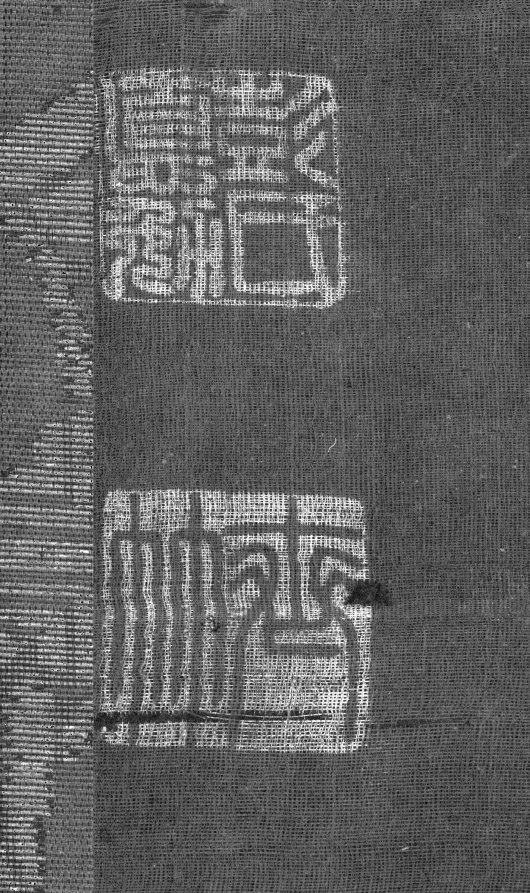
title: Ink Plum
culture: China, Ming dynasty (1368–1644)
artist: Peng Xu (Chinese, active 1488–1521)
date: late 1400s–early 1500s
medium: hanging scroll, ink on silk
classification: Painting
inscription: Artist's 2 seals at left middle edge of painting: Peng shi Te-mien; Shih-chu.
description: Seasonal paintings, including those depicting flowering plum trees in early spring, furnished scholars’ studios or other interior spaces in the house. Peng Xu is considered the foremost follower of the famous plum blossom painter Wang Mian (1287–1359) (see CMA 1974.26). The branches are brushed in the same vigorous manner leaving white streaks in the ink indicating the gnarled bark. The delicate blossoms are drawn in fine lines, while a gray wash covers the entire surface, only leaving the flower petals in reserve.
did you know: Plum trees blossom in the first months of the year; the delicate flowers endure the harsh winter frosts. A popular motif in Chinese ink painting, the plum symbolizes the winter season and is a harbinger of spring.